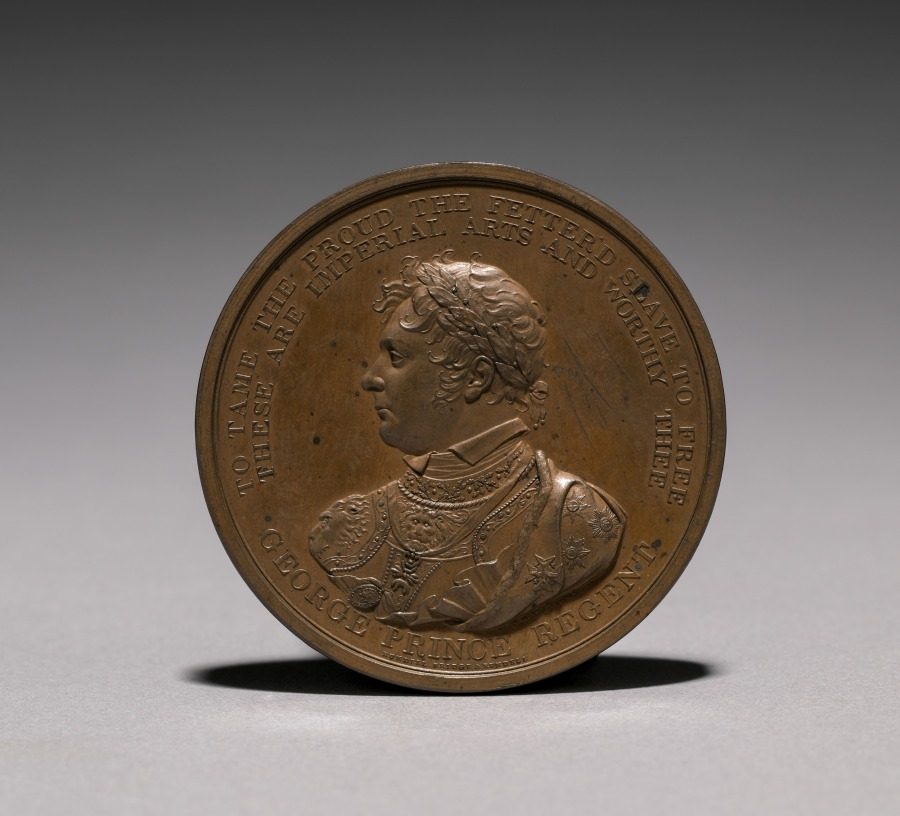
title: Portrait Medal of George, Prince Regent from The Pavilion Collection Series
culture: England, 18th century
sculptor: Thomas Wyon Jr. (British, 1792–1817)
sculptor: Thomas Wyon Sr. (British, d. 1830)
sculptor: Rundell, Bridge and Rundell (British, 1797–1834)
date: 1816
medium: bronze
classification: Metalwork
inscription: To tame the proud the fetter'd slave to free.